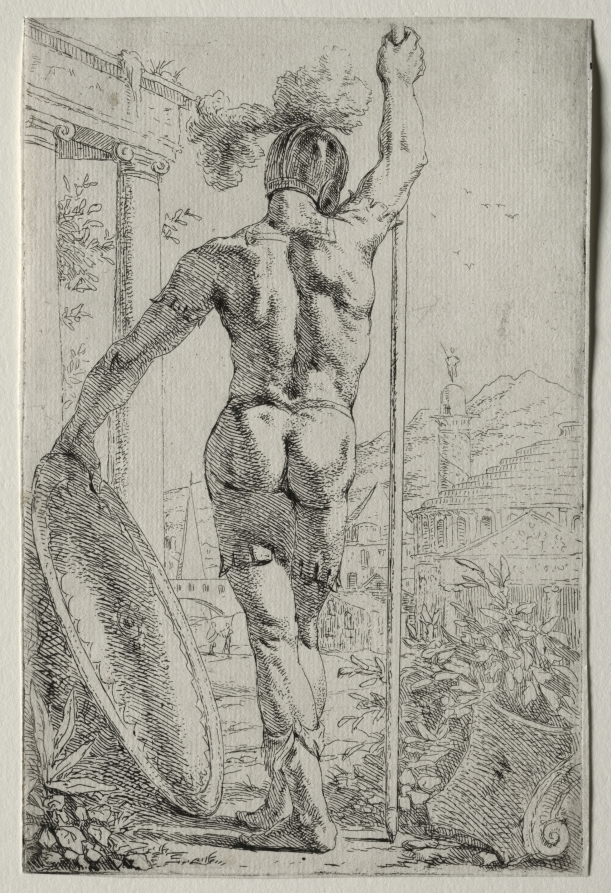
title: A Soldier Standing, Seen from Behind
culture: Netherlands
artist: Leendert van der Cooghen (Dutch, 1610–1681)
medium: etching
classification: Print